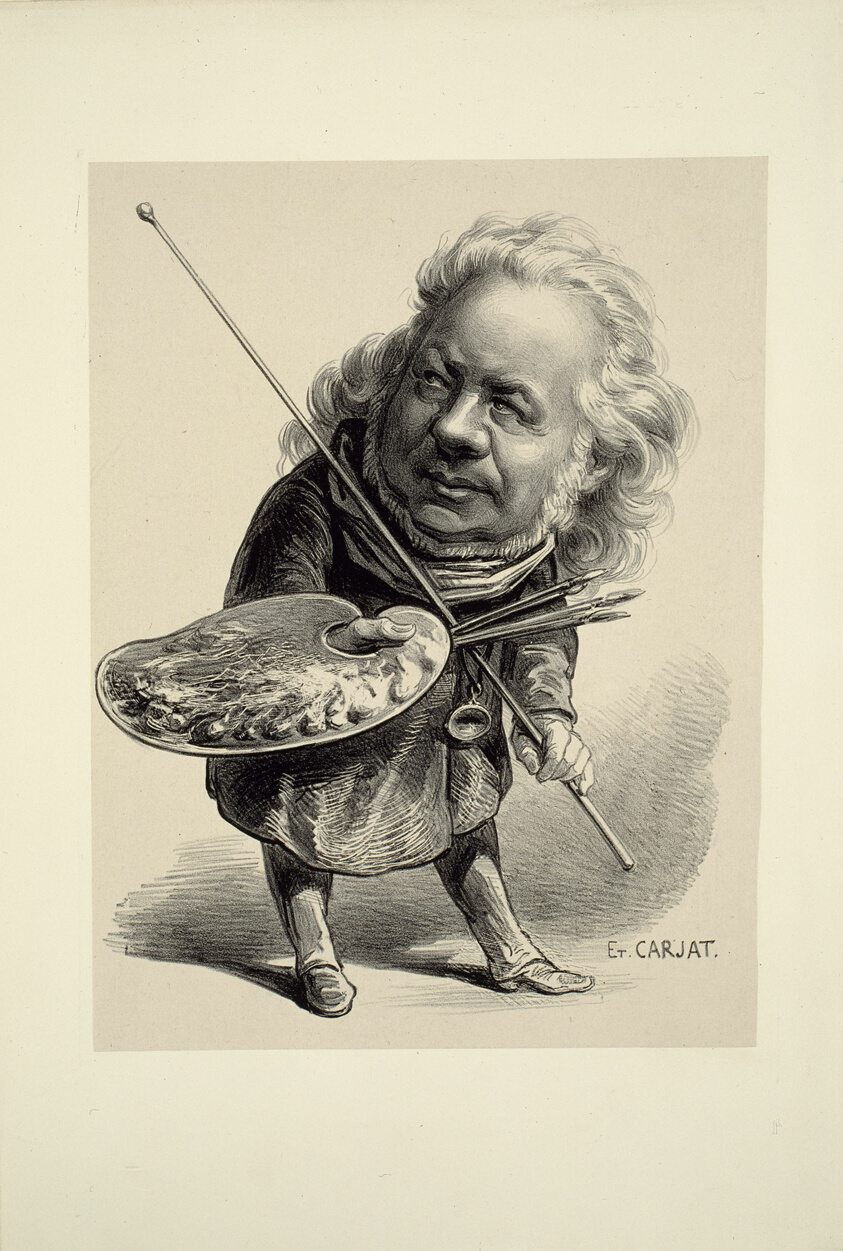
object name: Print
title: Portrait of Honoré Daumier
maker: Etienne Carjat (French, 1828-1906)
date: 1862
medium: Lithograph in black, with scraping on stone, on light gray China paper laid down using chine collé on white wove paper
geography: France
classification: lithograph; print; prints and drawing